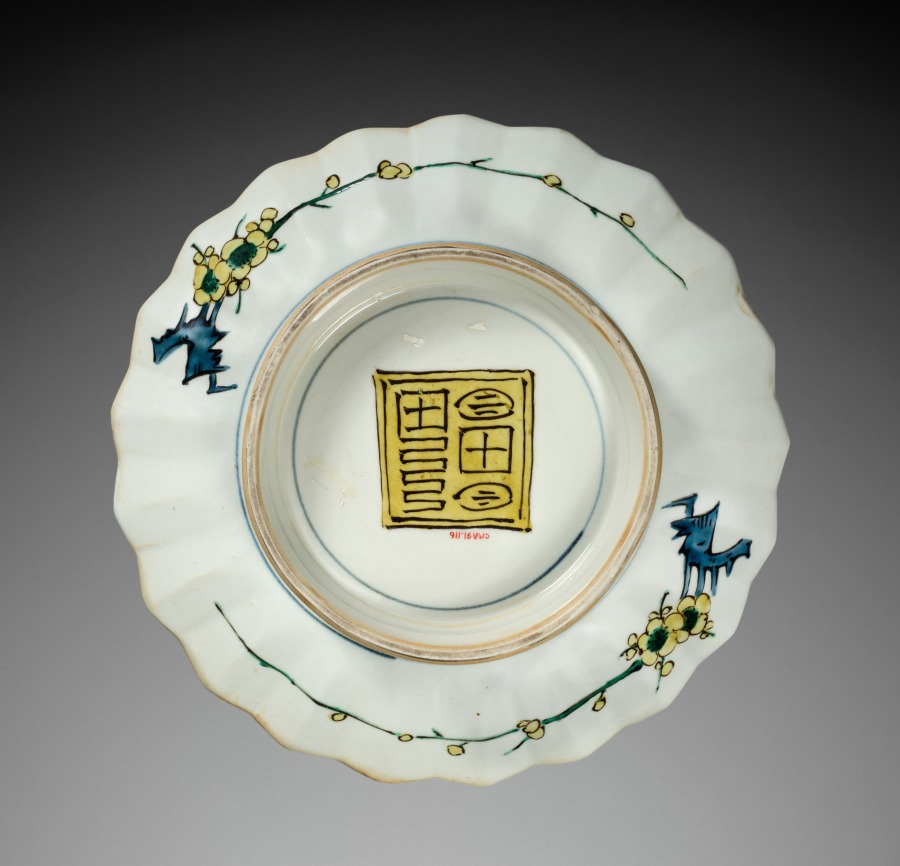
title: Foliate Dish with Banana Leaf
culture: Japan, Edo period (1615–1868)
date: mid-1800s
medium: porcelain with overglaze enamel decoration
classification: Ceramic